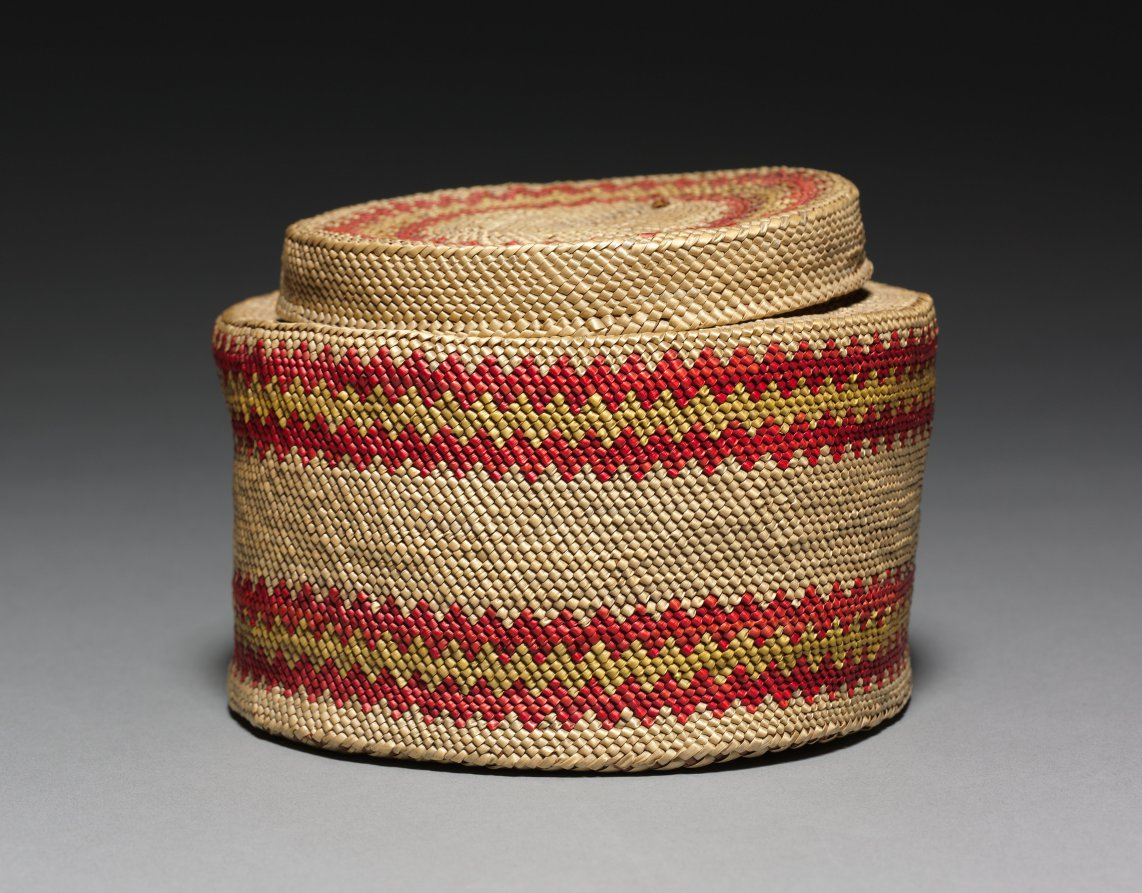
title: Ginger Jar- Shaped Basket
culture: Northwest Coast, Cape Flattery, Washington, Makah, late 19th-early 20th century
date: c 1900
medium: pear grass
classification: Basketry